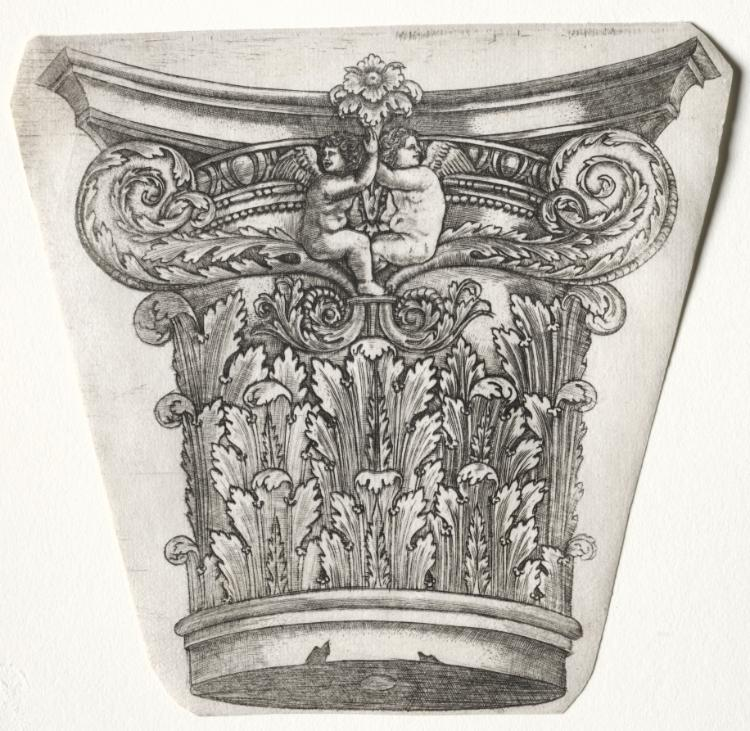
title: Base and Capital with Putti (capital)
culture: Italy, 16th century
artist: Master G. A. with the man-trap (Italian, active 1525–50)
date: c.1525–1550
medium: engraving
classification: Print